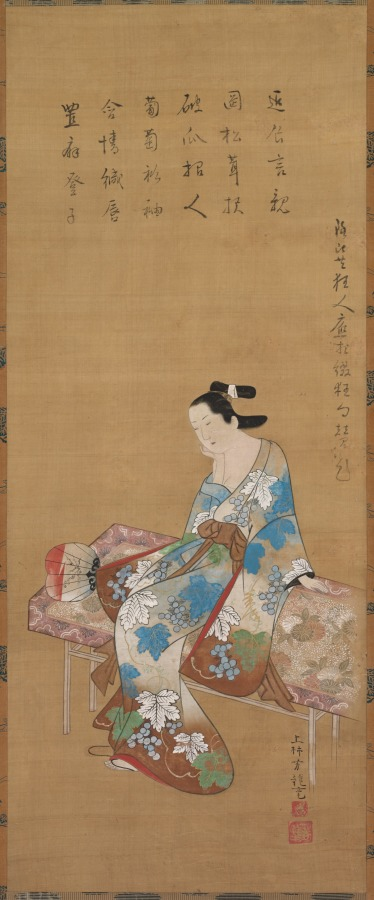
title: Courtesan Seated on a Bench Enjoying the Evening Cool in Summer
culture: Japan, Edo period (1615–1868)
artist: Kamigaki Hōryū (Japanese, dates unknown)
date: 1615–1868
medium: hanging scroll, ink and color on silk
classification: Painting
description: In a pensive pose with her chin resting in her hand, a courtesan is seated on a wooden bench that extends diagonally across the lower half of the scroll. Her open robe suggests that it is a warm evening-perhaps late summer or early fall, as indicated by the grapevine pattern on her kimono. The floral patterns in the composition hint at the seasons: the plum blossom on the fan for spring; grape pattern on the robe for late summer; and chrysanthemum design on the bench indicating autumn. Note also how the grapevine pattern in the painting's mounting mimics the design of her kimono. The overall mood is one of intimacy, created by Hõryþ through the delicate rendering of the courtesan's facial features and hands. In contrast to the other scrolls of beauties nearby, the artist here portrayed his subject with little background, allowing her grace and elegance to carry the picture.